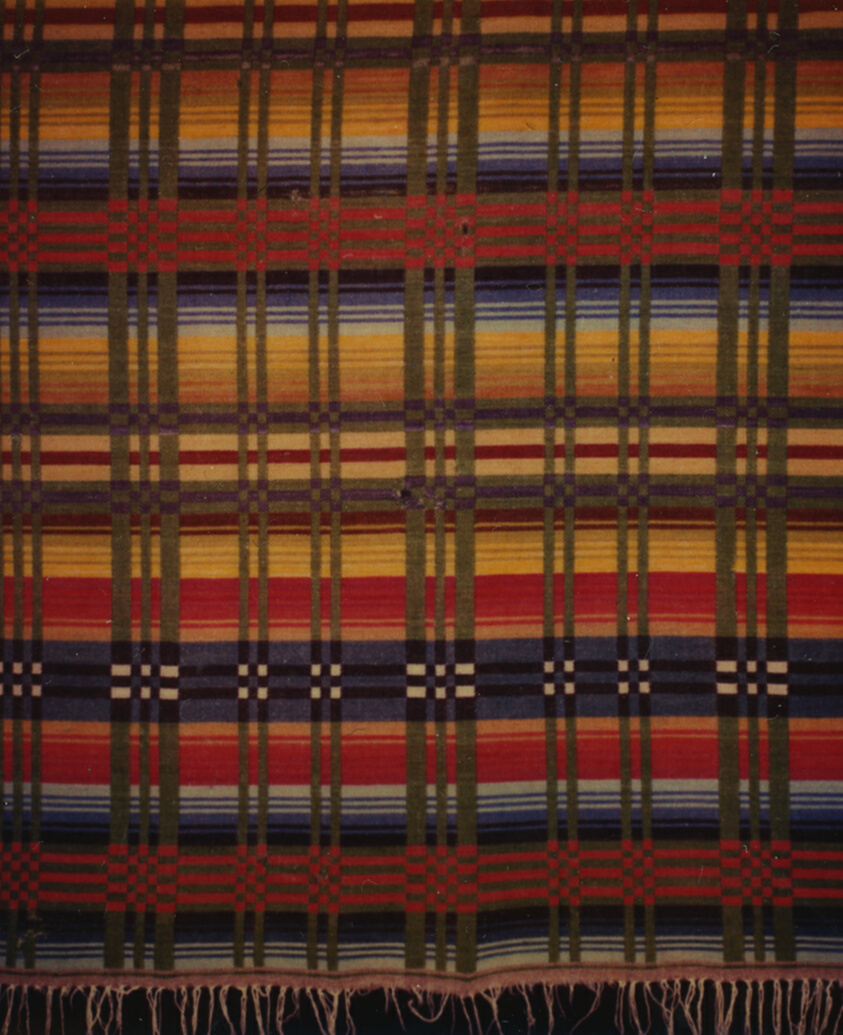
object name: Textile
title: Blanket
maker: United States, Southwest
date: 1875/1900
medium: Wool, double faced complementary weft broken twill weave; warp fringe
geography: Southwest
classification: textile; weaving